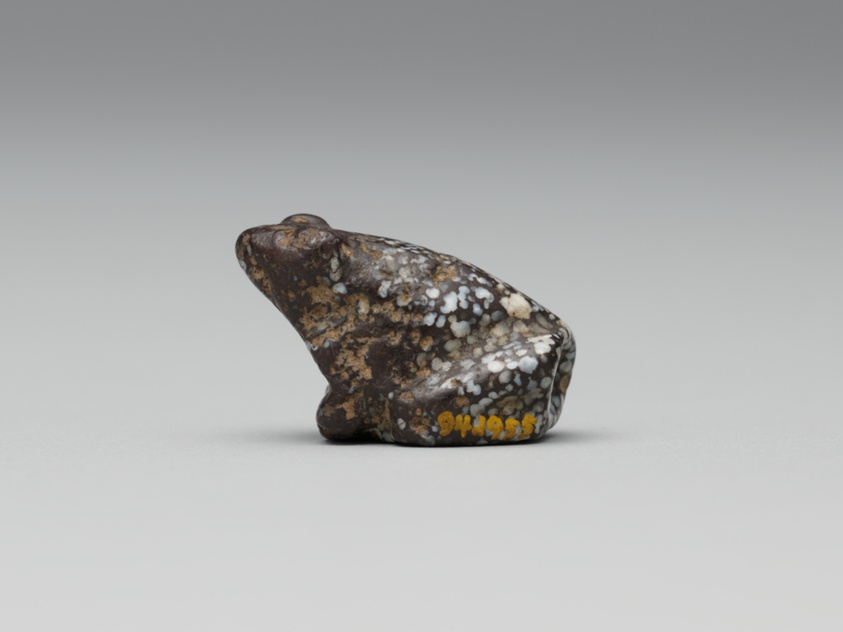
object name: Costume and Accessories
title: Amulet of a Frog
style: egyptian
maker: Egyptian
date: New Kingdom–Third Intermediate Period (about 1550–664 BCE)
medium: Stone (mottled brown white)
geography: Egypt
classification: amulet; jewelry; stone; ancient art; costume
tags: frog